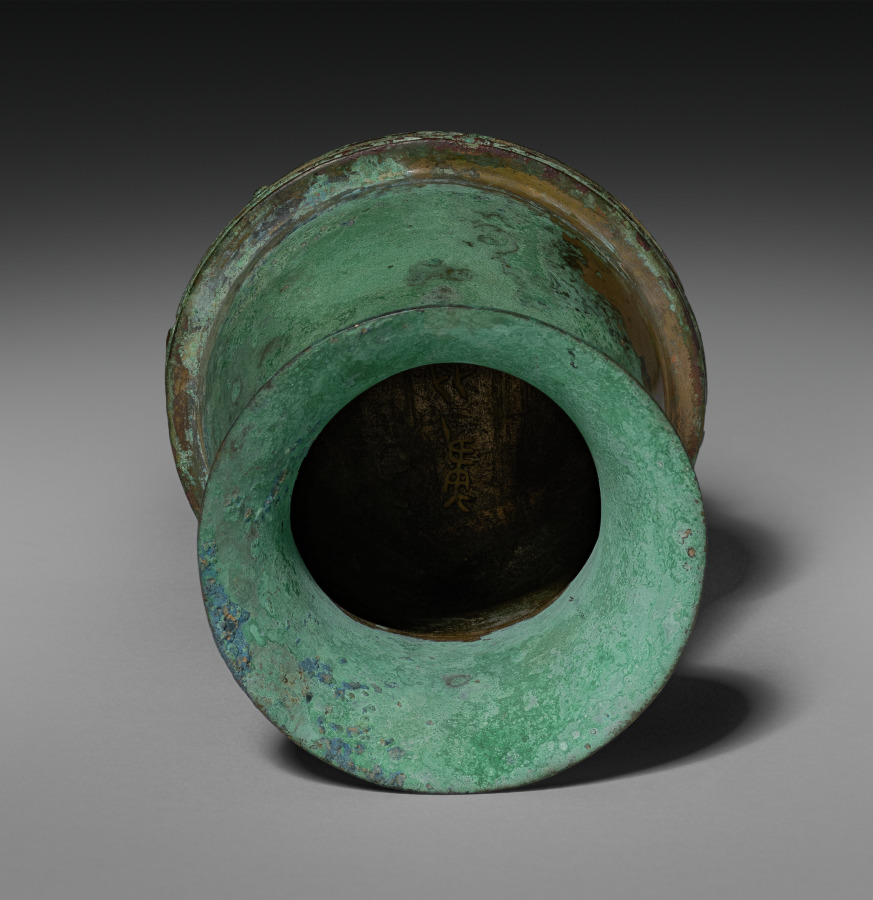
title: Wine Vessel (Hu) (lid)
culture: China, Western Zhou dynasty (c. 1046–771 BCE)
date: c. 1000–900 BCE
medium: bronze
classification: Metalwork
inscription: inscription inside top (cup): 事从作壺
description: This tall, slender bronze wine vessel, called a hu, has three bands of ornamentation: one above the foot, one around the neck, and one on the cover. Stylized birds or phoenixes are in the band around the neck, while the band on the cover and foot feature geometric dragons. The dragon and the phoenix may represent the Yin and Yang and would be equally appropriate on a bronze of either secular or religious purposes. It likely held liquids like wine at festive banquets or religious ceremonies.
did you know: When inverted, the cover forms a cup.